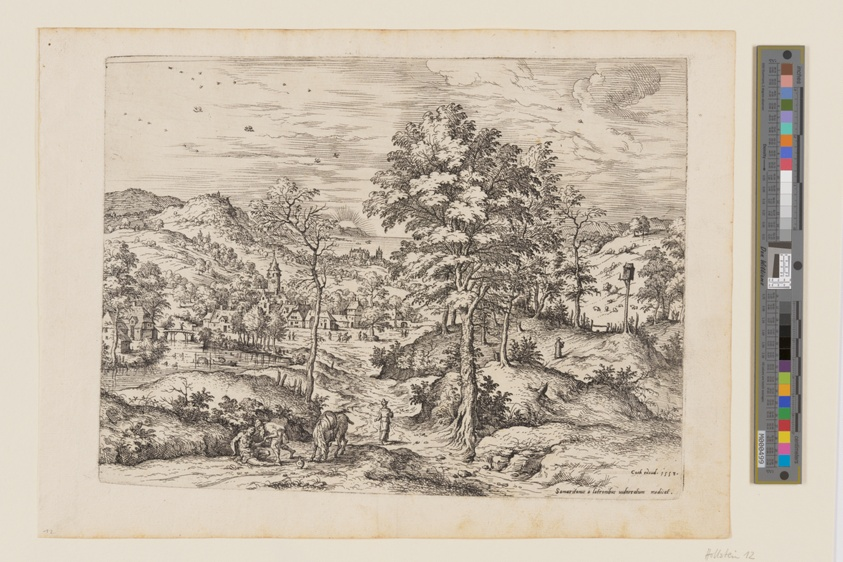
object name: Print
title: The Good Samaritan, from Landscapes with Biblical and Mythological Scenes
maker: Hieronymus Cock (Netherlandish, c. 1510–1570); after Matthys Cock (Netherlandish, c. 1505-1548)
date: 1558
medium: Etching on ivory laid paper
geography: Netherlands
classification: etching; paper; print; prints and drawing